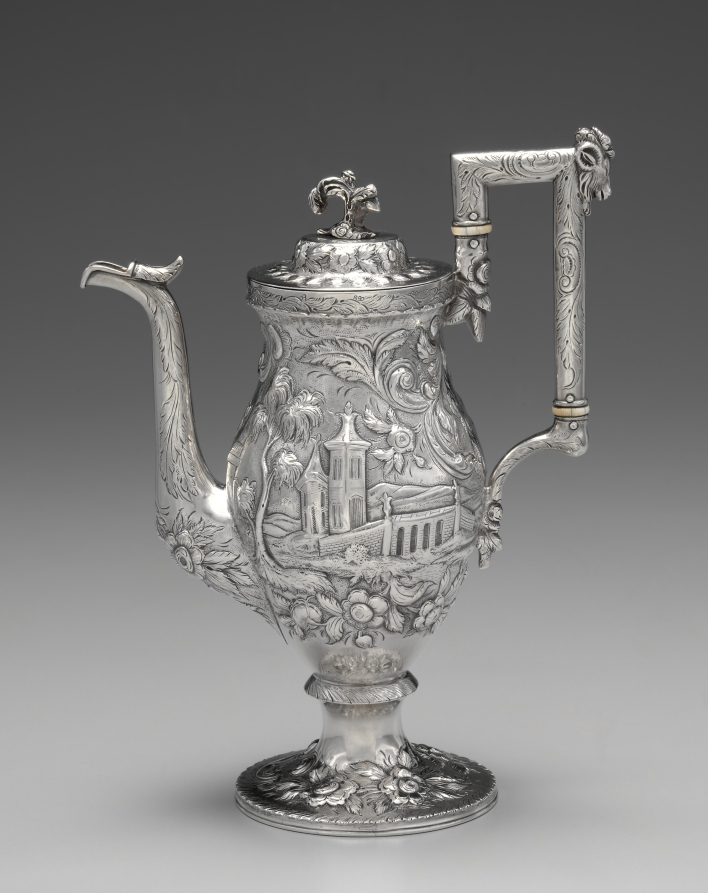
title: Neo-Rococo Coffee Pot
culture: America, Baltimore, 19th century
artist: Samuel Kirk (American, 1793–1872)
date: c. 1840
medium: silver and ivory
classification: Silver